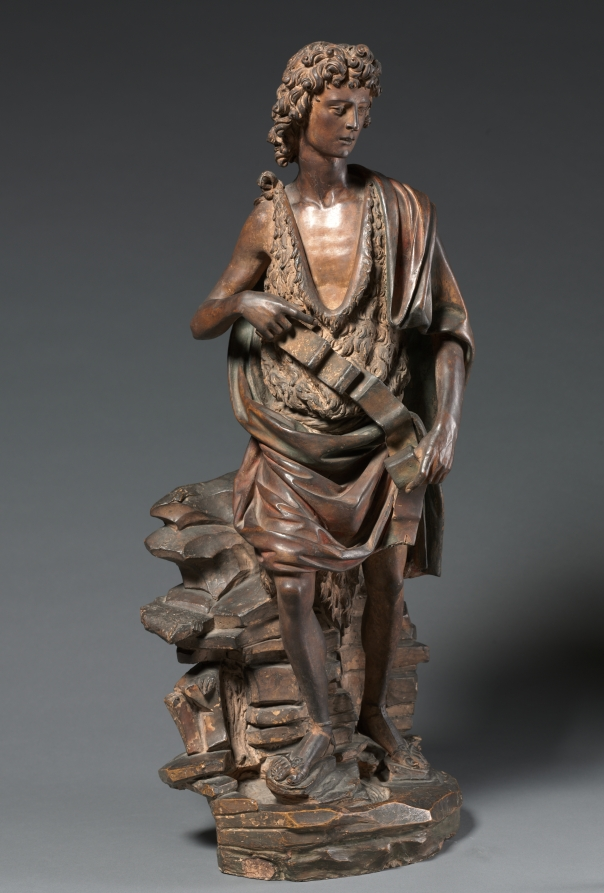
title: Saint John the Baptist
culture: Italy, Florence, 16th century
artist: Master of the Saint John Statuettes (Italian)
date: c. 1500–1525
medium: terracotta with traces of polychromy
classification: Sculpture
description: This statuette belongs to a group of terracotta sculptures representing David (from the OldTestament) and Saint John (from the New Testament) produced by a still unidentified Florentine artist and his studio in the late 1400s and early 1500s. Giventheir scale, it seems likely that these sculptures were intended for use in private homes rather than churches.